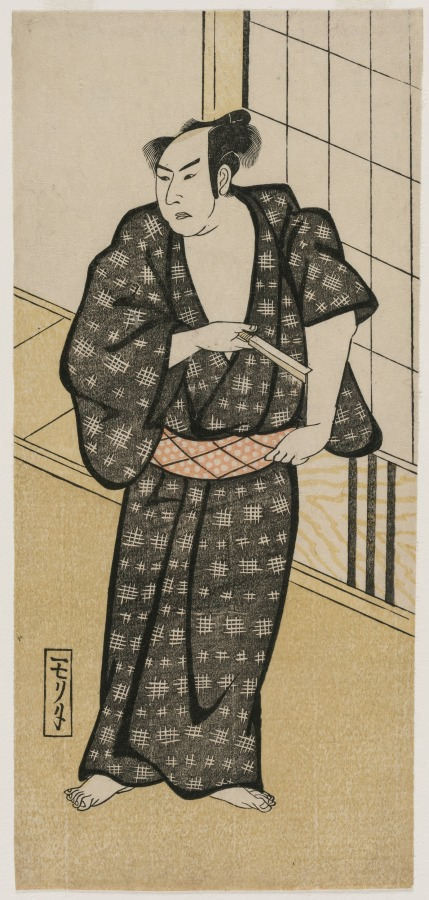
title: Actor Holding a Razor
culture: Japan, Edo period (1615–1868)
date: 1790s-early 1800s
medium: color woodblock print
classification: Print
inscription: Publisher: Morita